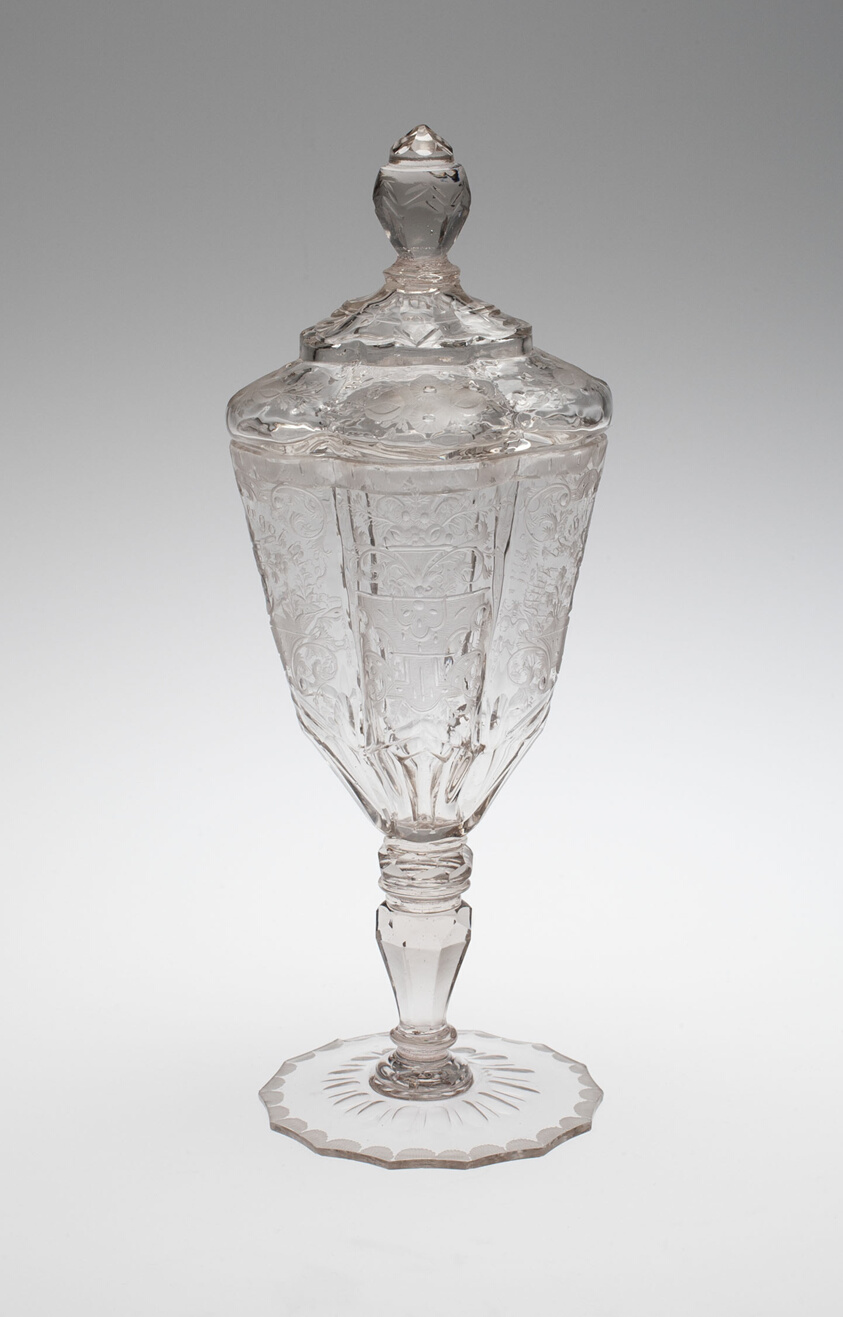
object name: Glass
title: Covered Goblet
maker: Germany, Riesengebirge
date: c. 1740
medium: Blown and molded glass with engraved decoration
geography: Riesengebirge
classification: glass; european decorative arts